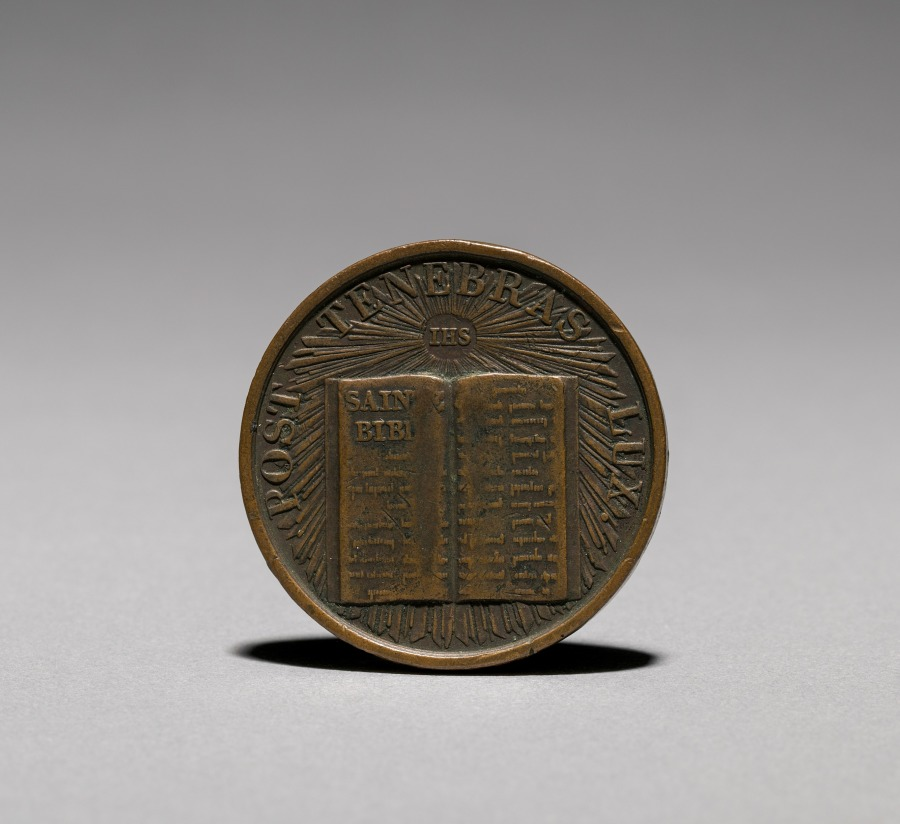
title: Medal: Commemorating 3c Jubilé de la Reformation Genève 23 Aôut 1835 (obverse)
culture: France ? or Switzerland ?, 19th century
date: 1835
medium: bronze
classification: Metalwork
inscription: Post tenebras lux lux I.H.S. Saint Bibi (last letter effaced).